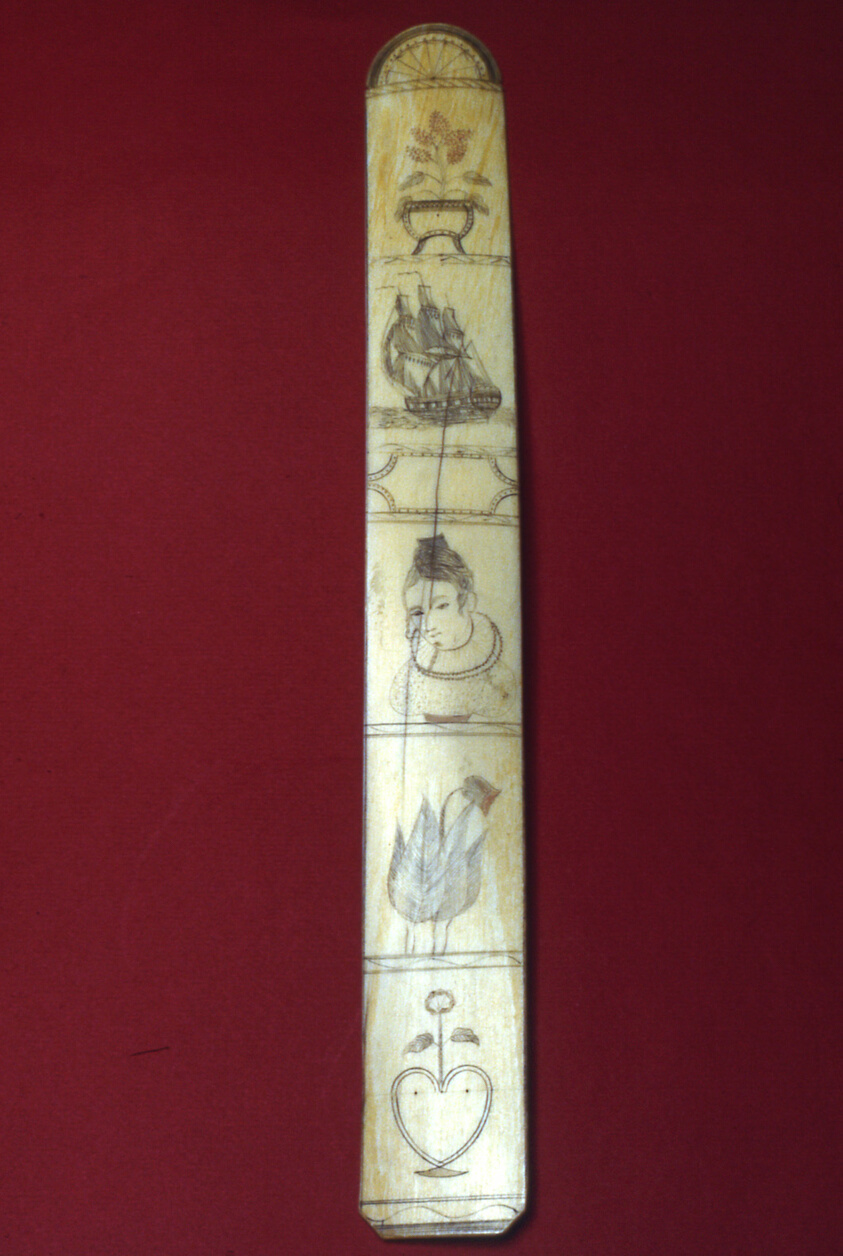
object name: Costume and Accessories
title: Busk (Corset Stay)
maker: Probably Holland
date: c. 1800/10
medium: Bone, etched; flower vase, sailing vessel, portrait head, tulip and heart, in separate panels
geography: Holland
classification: textile; costume accessory; accessories (object genre); costume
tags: fashion